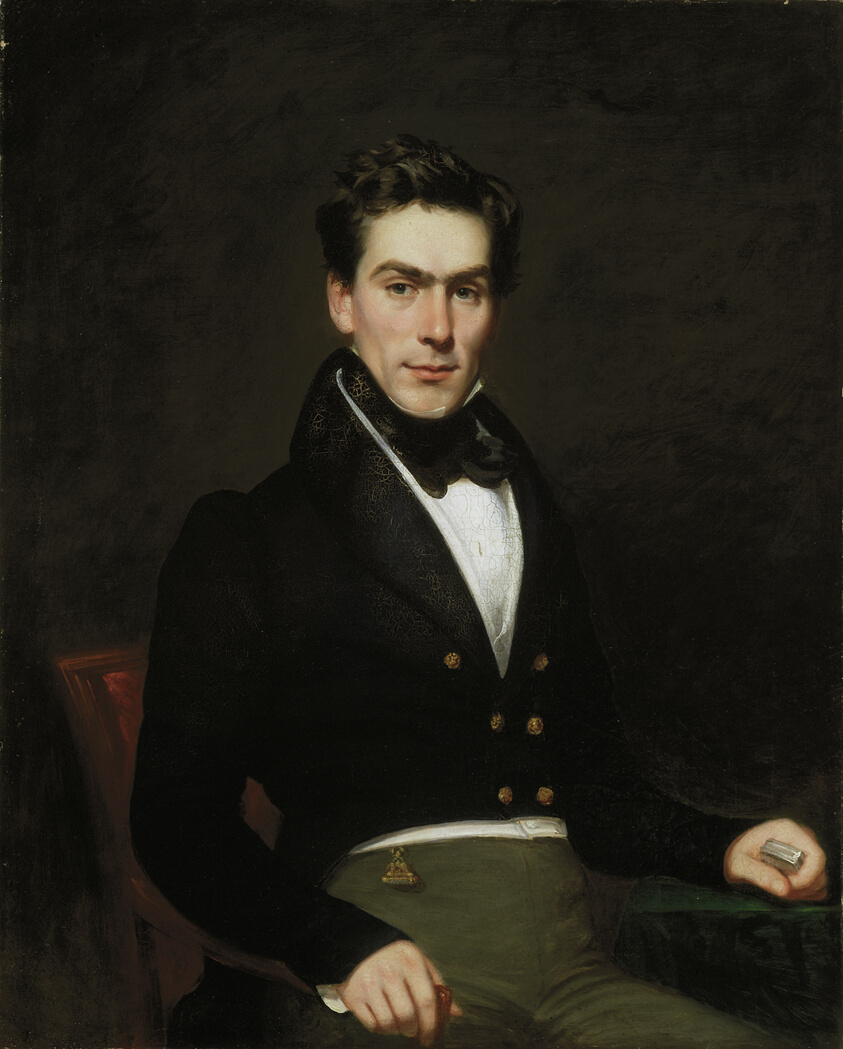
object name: Painting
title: Mr. James Mackie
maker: Samuel Lovett Waldo; American, 1783–1861; William Jewett; American, 1792–1874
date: 1830–40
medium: Oil on canvas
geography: United States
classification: painting; american arts